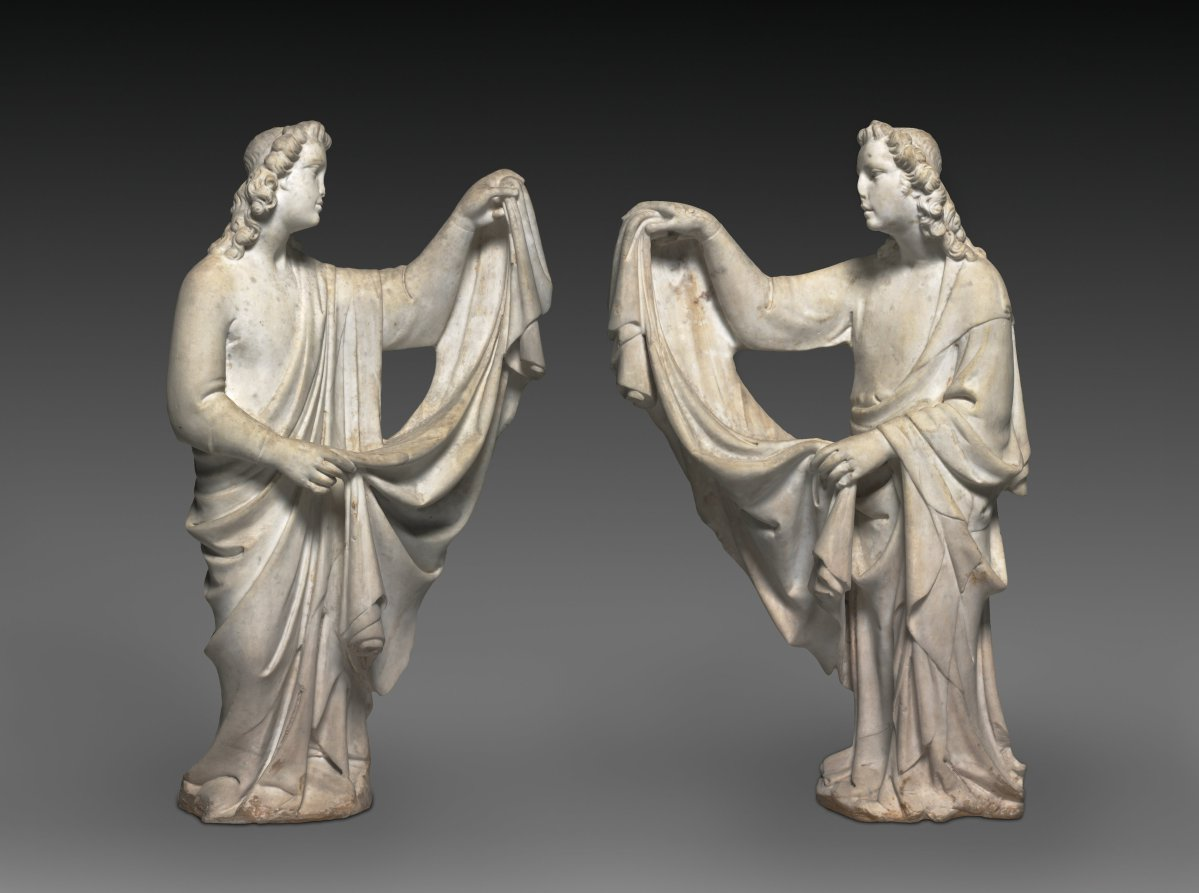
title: Angel from a Tomb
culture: Italy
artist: workshop of Tino di Camaino (Italian, c. 1285–1337)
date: 1330–50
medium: marble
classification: Sculpture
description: Tino da Camaino was active in Siena, Pisa, and Florence after 1311 where he established his reputation as an important and gifted sculptor. In 1323 he was summoned to the Angevin court at Naples, probably by King Robert of Anjou to work on the sepulchral monument of the king's daughter-in-law, Catherine of Austria. During the remainder of his life, Tino created a remarkable series of tomb sculptures in Naples. This pair of marble angels most likely represents the work of a member of Tino's workshop produced for one of these Neapolitan tombs, either during the final years of the master's life, or else independently after Tino's death in 1337.